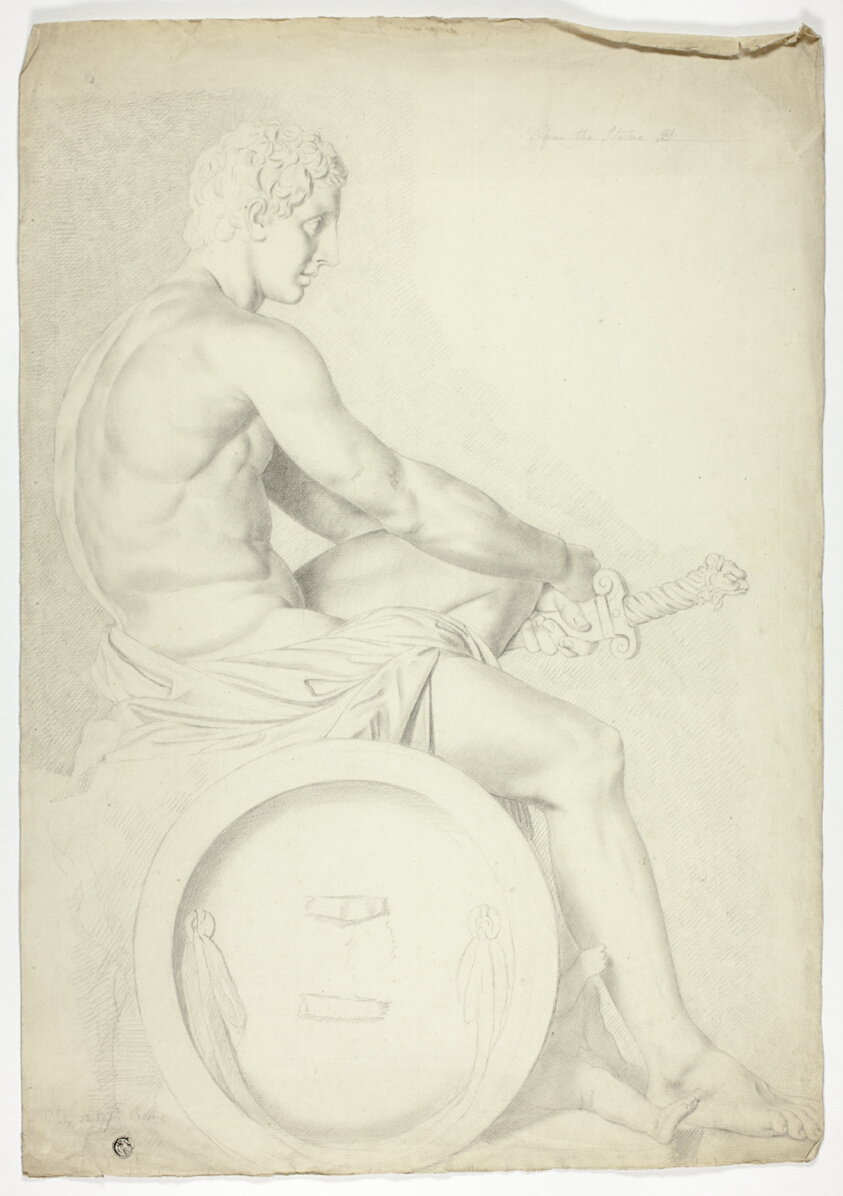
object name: Drawing and Watercolor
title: After Antique Sculpture of Seated Figure with Sword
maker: John Downman (English, 1750-1824)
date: 1774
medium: Black chalk with stumping on ivory laid paper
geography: England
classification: chalk; drawings (visual works); prints and drawing; paper